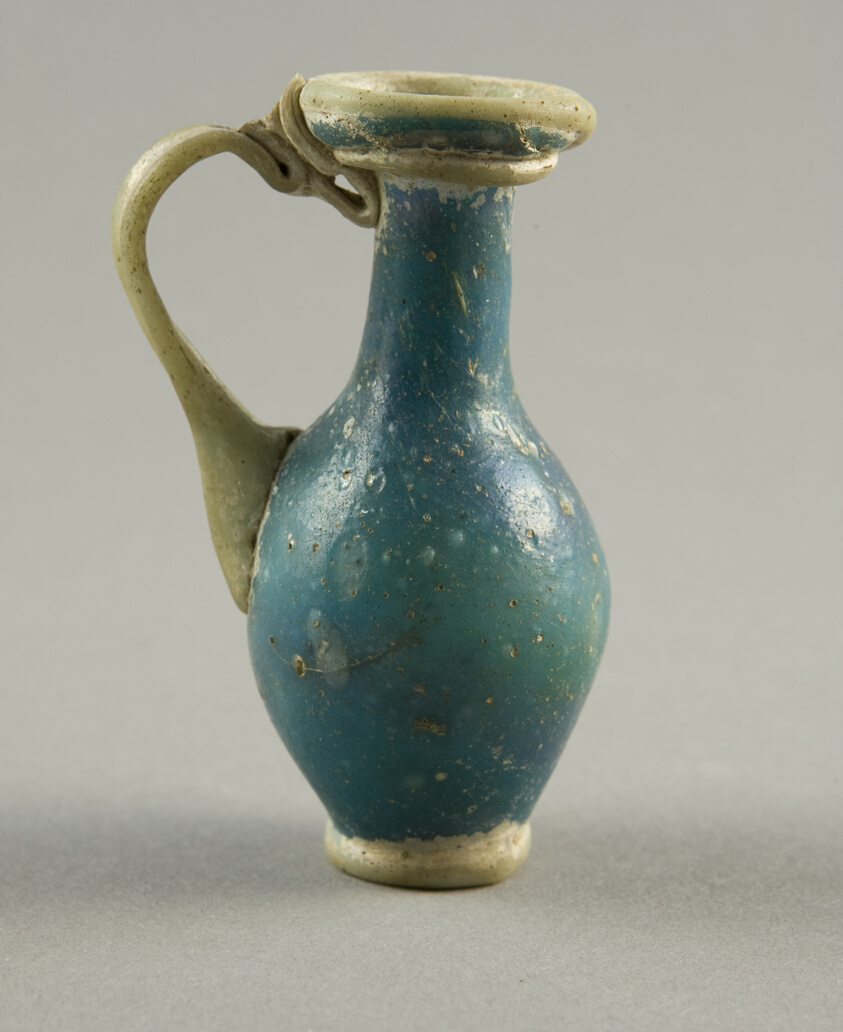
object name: Vessel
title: Jug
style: roman (ancient, style or period), ancient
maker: Roman; probably Rheinland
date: 3rd century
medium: Glass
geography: Mediterranean Region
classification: glass; vessel; ancient art